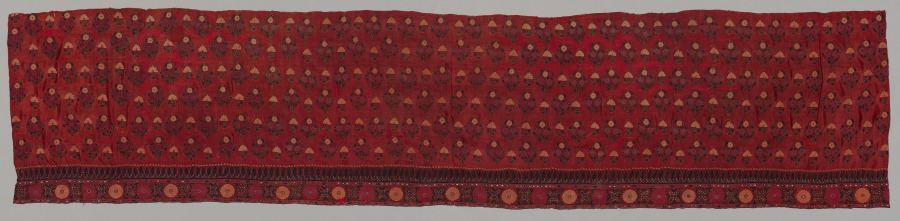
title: Fragment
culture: Western India, Gujarat, Kachchh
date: 1800s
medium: embroidery with mirror inserts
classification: Embroidery